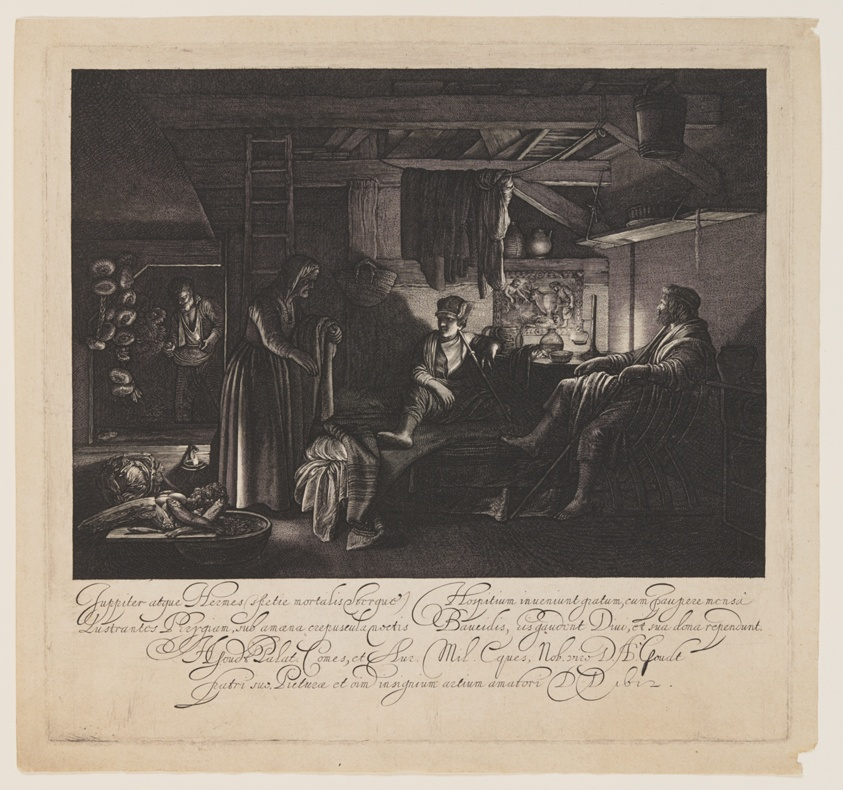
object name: Print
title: Jupiter and Mercury in the House of Philemon and Baucis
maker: Hendrick Goudt (Dutch, 1583–1648); after Adam Elsheimer (German, 1578-1610)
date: 1612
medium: Engraving on ivory laid paper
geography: Netherlands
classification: print; paper; prints and drawing; engraving